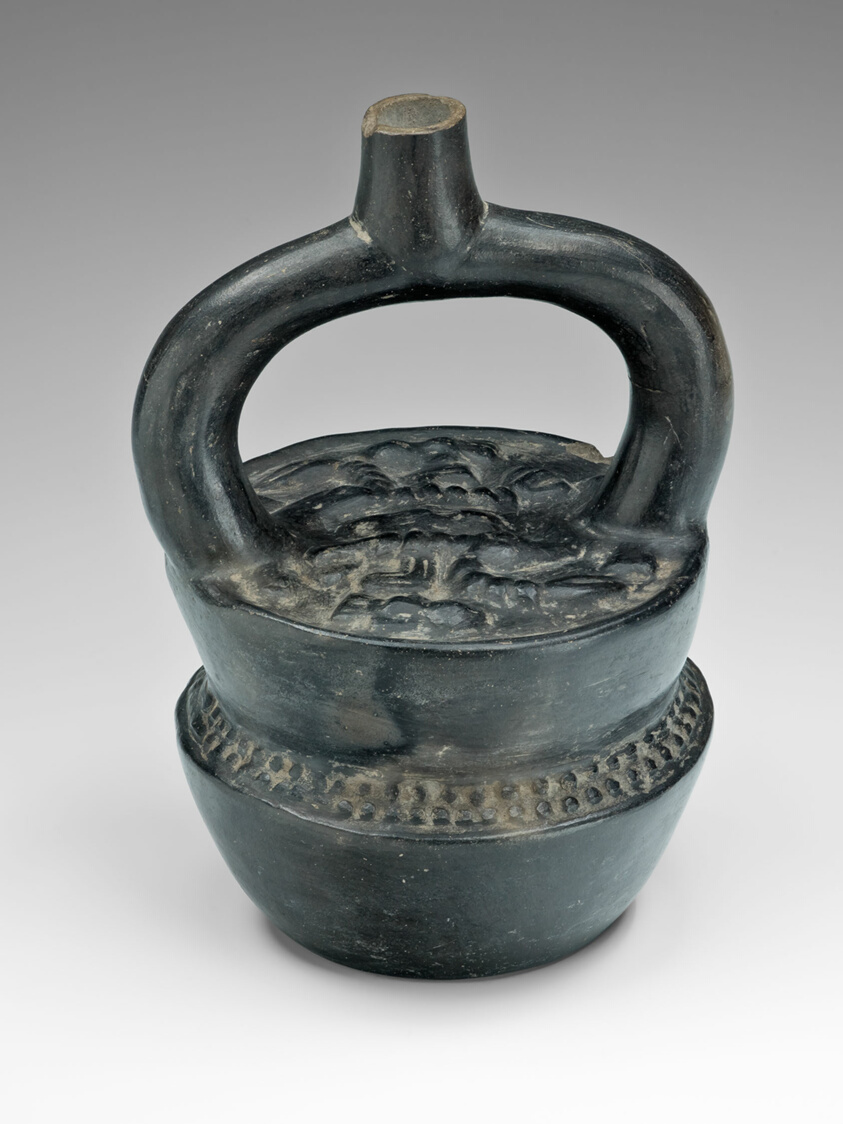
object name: Vessel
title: Stirrup Spout Vessel in Form of Stacked Bowls of Food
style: moche, Arts of the Americas, andes, south american, andean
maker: Moche (North coast, Peru)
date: 100 BCE–500 CE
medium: Ceramic and pigment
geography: Peruvian North Coast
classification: blackware (black basaltes); earthenware; ceramics; vessel; art of the americas